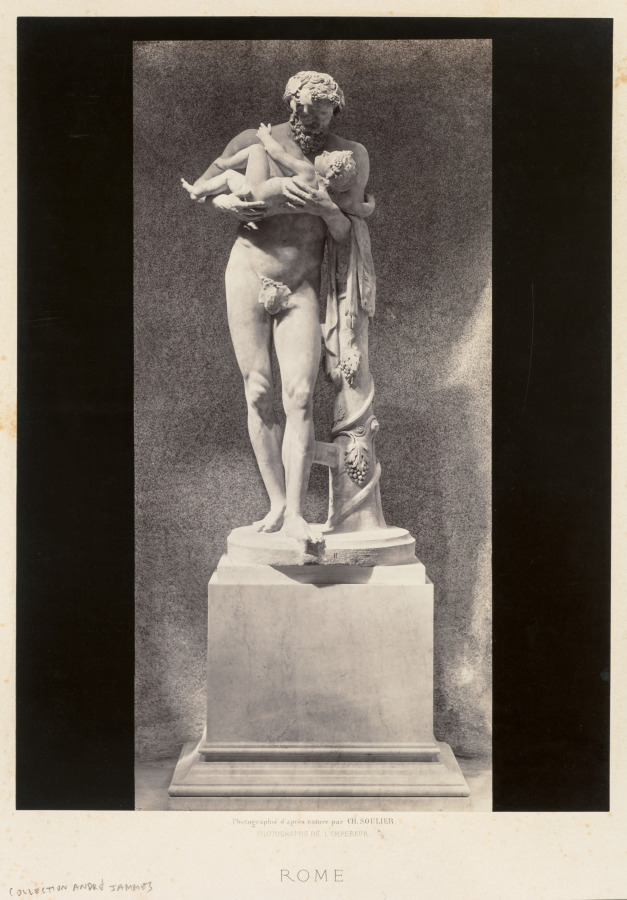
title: Silenus Holding the Child Dionysus, Louvre Museum, Paris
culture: France, 19th century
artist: Charles Soulier (French, 1830–1900)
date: c. 1860s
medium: albumen print from collodion negative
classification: Photograph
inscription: Imprinted in black type on recto of mount: “Photograpié d’après nature par CH. SOULIER/PHOTOGRAPHE DE L’EMPEREUR/ROME” Written in pencil on recto of mount: “Collection André Jammes” Written in pencil on verso of mount: “IT-207 Charles Soulier/1000”